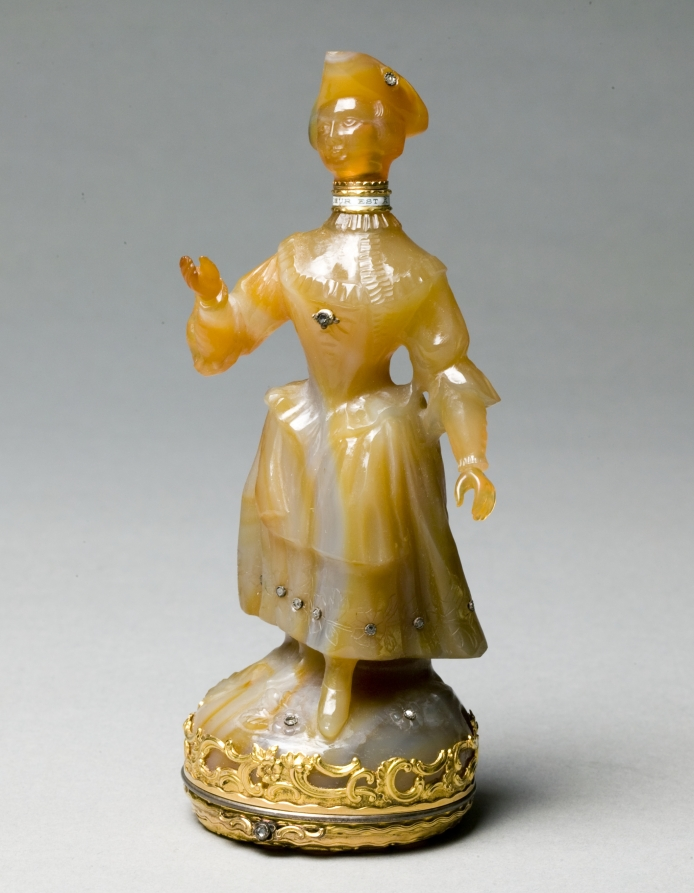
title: Scent Bottle and Box in the Form of a Woman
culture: England, mid 18th century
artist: attributed to James Cox (British)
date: c 1880–1890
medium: carved yellow and light brown agate from a single piece.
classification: Cosmetic Objects